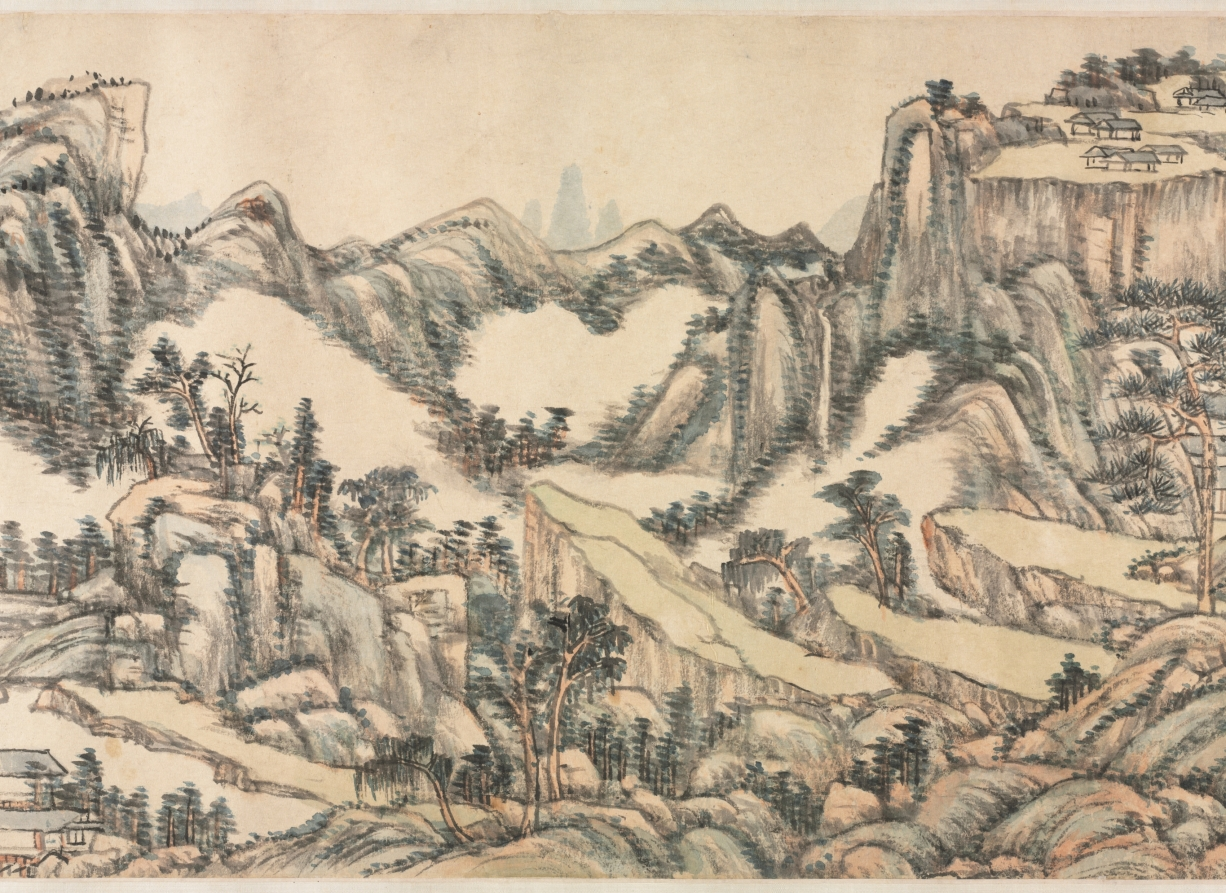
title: Green Peaks under Clear Sky: After Huang Gongwang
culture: China, Qing dynasty (1644-1911)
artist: Wang Yuanqi (Chinese, 1642–1715)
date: 1703–8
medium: handscroll; ink and light color on paper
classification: Painting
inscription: 晴巒霽翠：倣黃子久。麓臺。[印]石師道人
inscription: [印] 御書畫圖留與人看. 子久畫於宋諸大家荊、關、李、范、董、巨，無所不有。運筆不假修飾。皴法由淡入濃，化諸家之迹者也。澹明徐君偶見縮本，臨摹六幅。囑余參以富春大意，成一長卷。余夙夜在公，乘暇偶一點染。至戊子九秋告竣，閱四、五年矣。昔大癡為無用師作富春卷，七年而成，為千古鉅觀。今拙筆癡鈍。亦淹留至此。可為識者噴飯矣。王原祁題。[印]王原祁印; 麓臺 [印, 畫芯左下] 西廬後人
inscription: 3 additional colophons and 15 additional seals: 1 colophon and 9 seals of Yang Shicong 楊士驄 (b. 1870); 1 colophon of Wu Hufan 吳湖帆 (1894–1968); 1 colophon and 1 seal of Wu Mei (20th c.); 5 seals of Cheng Qi 程琦 (1911–1988).